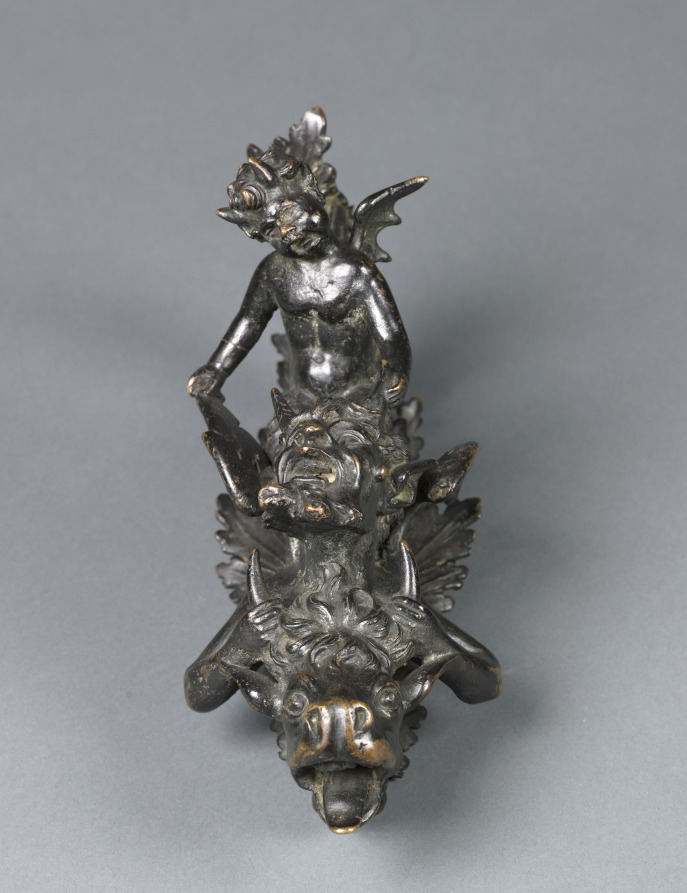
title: Doorknocker with Two Satyrs Riding an Ox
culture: probably Italy, Style of Padua, 16th Century, 19th century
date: 1800s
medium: bronze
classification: Sculpture